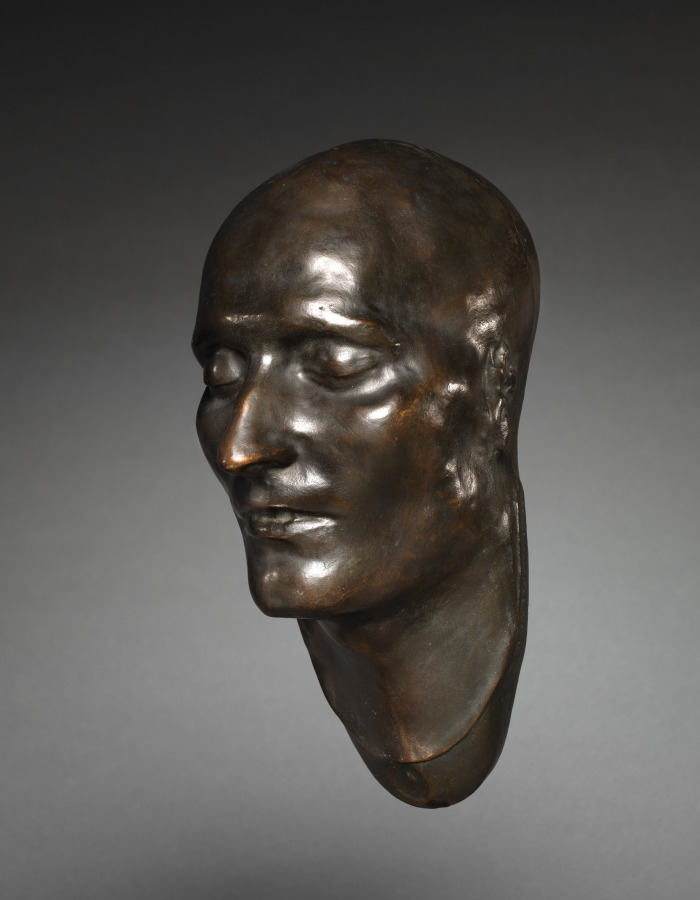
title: Mask of Napoleon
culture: Italy, 19th century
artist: C. Francesco Antommarchi (Italian, 1780–1838)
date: early 19th century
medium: bronze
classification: Sculpture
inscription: Signed on one side, inscribed on the other: "A Loie Fuller. E. Rudier, fondeur"